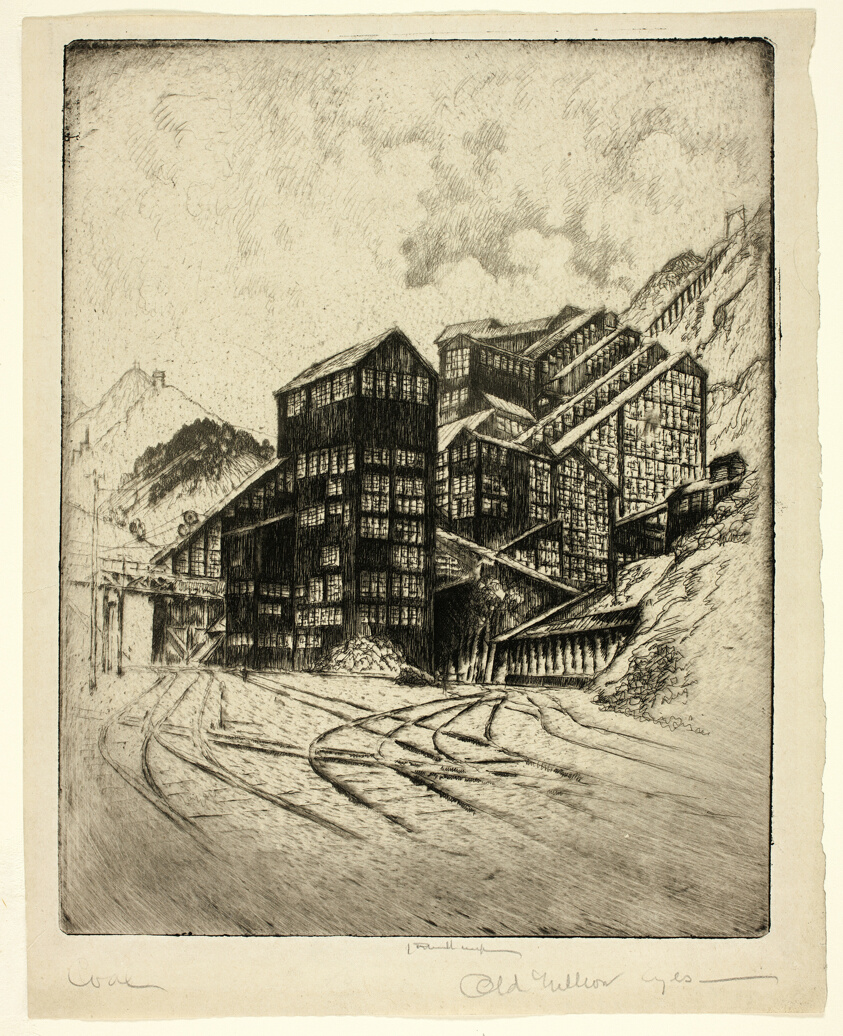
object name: Print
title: Old Million Eyes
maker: Joseph Pennell (American, 1857-1926)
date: 1909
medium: Etching on cream wove paper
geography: United States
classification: etching; print; prints and drawing